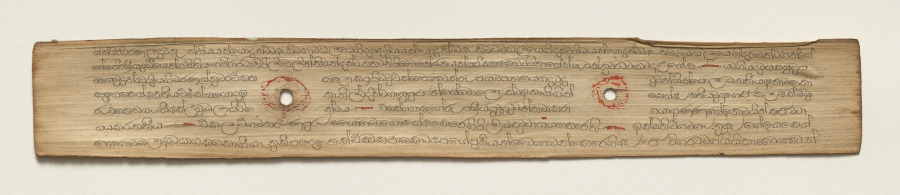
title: Leaf from a Buddhist Manuscript (verso)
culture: Sri Lanka, Singhalese, Late 17th century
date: c. 1700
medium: fiber paper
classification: Manuscript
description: Palm leaf material is still used for manuscripts in Sri Lanka. The palm leaves are prepared first by boiling them, drying them in the sun, and then rubbing them with oils. Scribes then use a metal stylus to incise the text. Then charcoal powder is wiped across the pages, filling in only the inscribed lines.